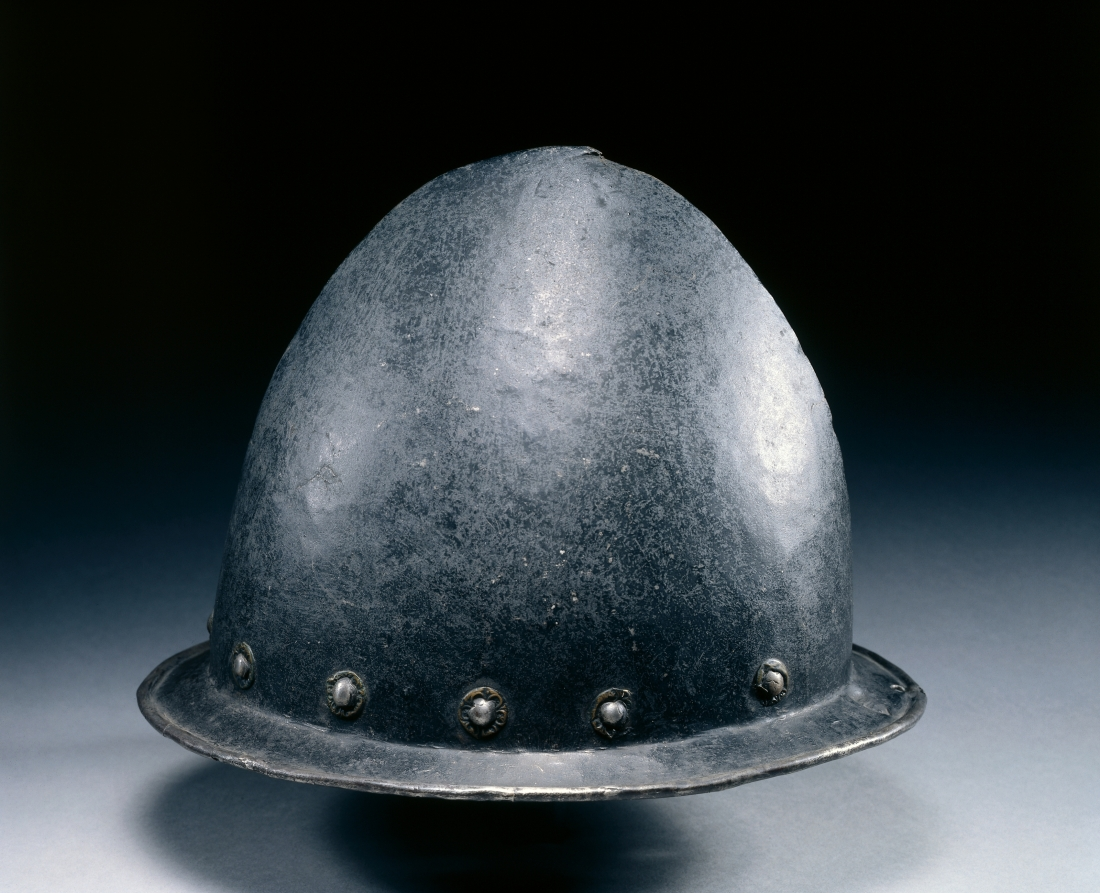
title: Cabasset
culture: Italy, 16th century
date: c. 1570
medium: steel, black paint, brass rosette rivets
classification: Arms and Armor